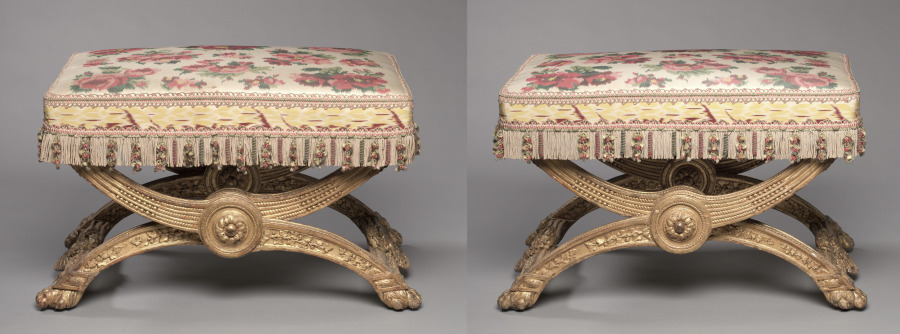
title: Pair of Stools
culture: France, 18th century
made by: Jean-Baptiste-Claude Sené (French, 1748–1803)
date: 1786–87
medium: carved and gilded wood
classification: Furniture and woodwork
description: These stools were made for the gaming room of Marie-Antoinette at the Chateau de Compiègne and later placed in the Chateau de Fontainebleau.